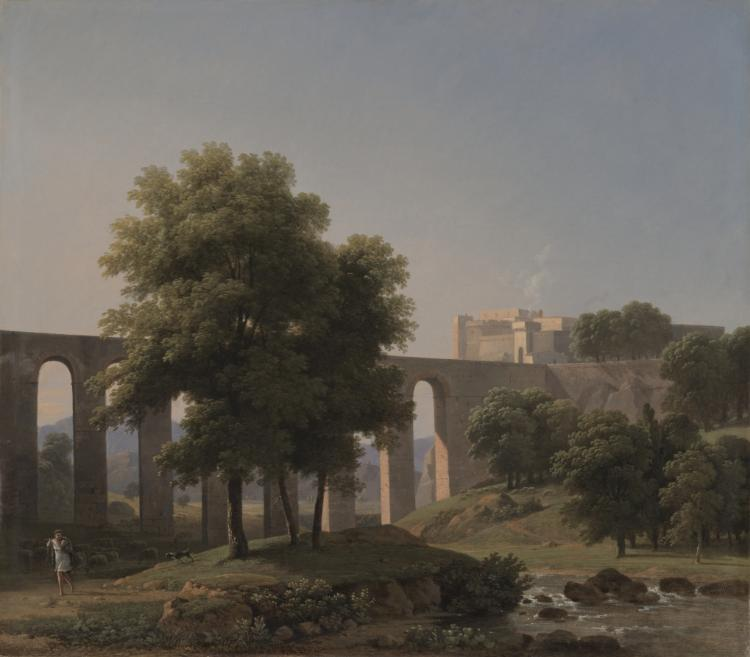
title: An Aqueduct Near a Fortress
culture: France, 19th century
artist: Jean-Victor Bertin (French, 1767–1842)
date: 1807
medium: oil on fabric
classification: Painting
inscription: Signed in transparent brown paint in the lower right corner: Bertin /1807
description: The arcade, or covered passageway lined with arches, appeared frequently as part of aqueducts, bridges, galleries, and even as arches in foliage in paintings by Bertin and his contemporaries in the early 19th century. While some of Bertin’s paintings of aqueducts were likely painted from nature, this one appears to be a product of the artist’s imagination.